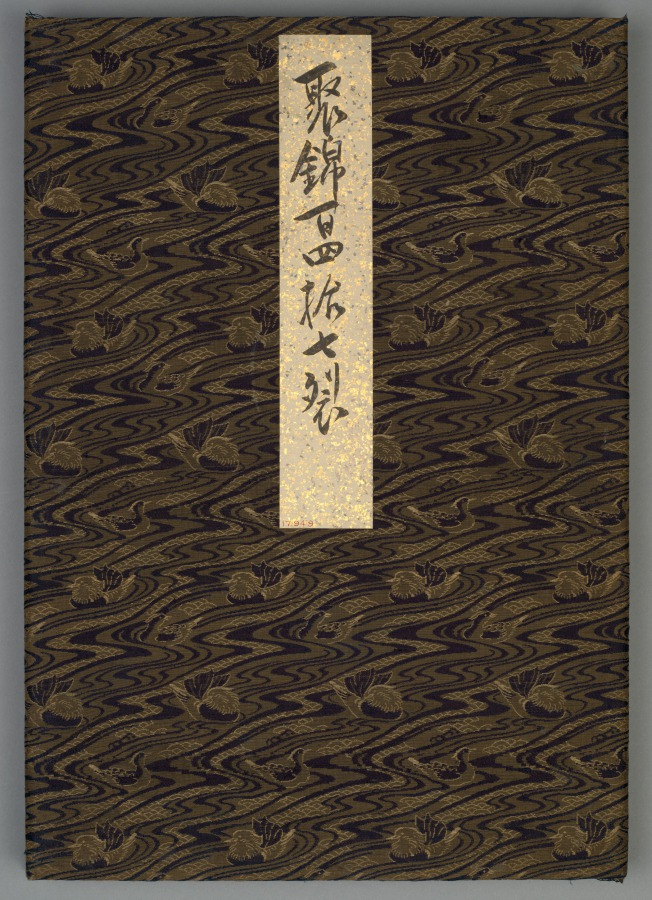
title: Album of Textile Samples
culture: Japan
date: 1790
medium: silk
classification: Textile